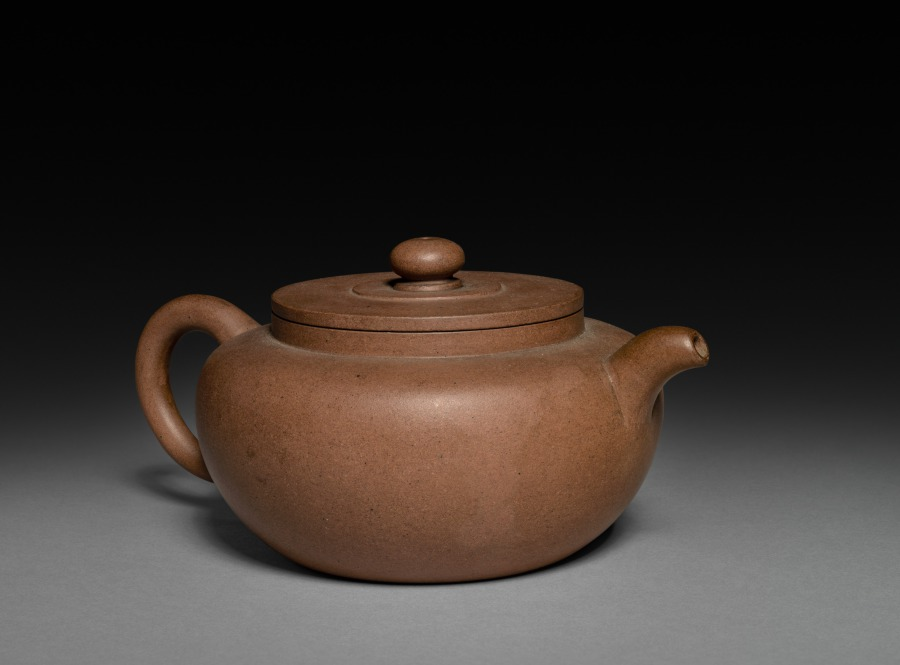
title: Teapot: Yixing ware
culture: China, Qing dynasty (1644-1911)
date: 1644–1911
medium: stoneware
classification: Ceramic